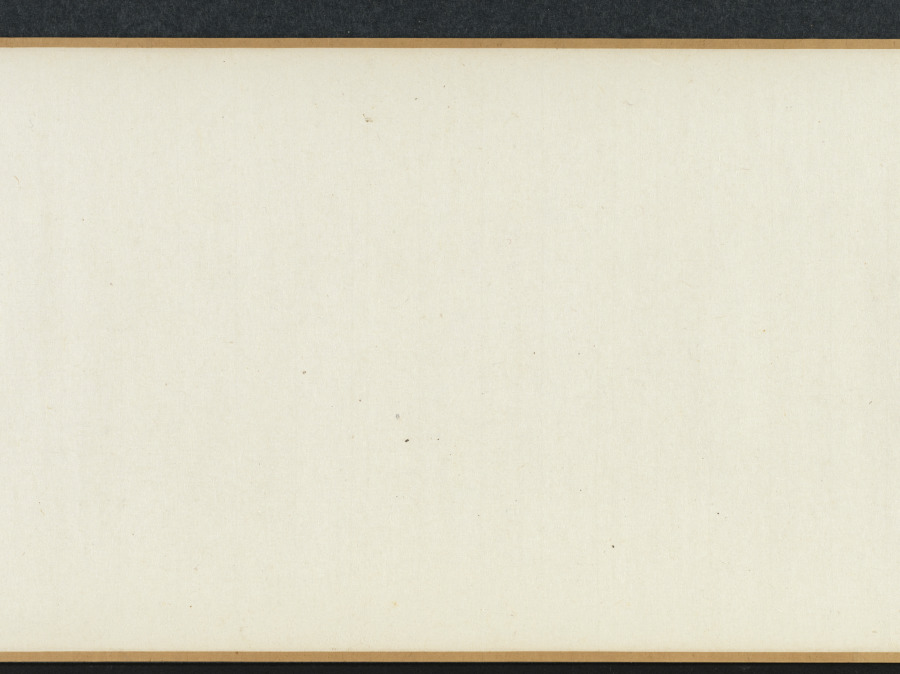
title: Zhao Mengfu Writing the Heart (Hridaya) Sutra in Exchange for Tea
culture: China, Ming dynasty (1368–1644)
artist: Qiu Ying (Chinese, 1494–1552)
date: 1542–43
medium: handscroll, ink and light color on paper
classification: Painting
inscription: Inscription accompanying text of "Heart" sutra, by Wen Zhengming 文徵明 (1470-1559): Zhengming 徵明, written in a boat at Kunshan 崑山, on the twenty-first day of the ninth month, in the renyin 壬寅 year, the twenty-first year of the Jiajing era [1542].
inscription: Colophon by Wang Shih-mou: Chou Yü-shün [Feng-lai] of K'un-shan was a scholarly, refined connoisseur of antiquities. He had acquired the poem written by Chao Ch'eng-chih [Chao Meng-fu] about the exchage of tea for Chao's calligraphy of the Prajna sutra. But the sutra itself, also written by Chao Meng-fu, is lost. He therefore asked Ch'iu Shih-fu [Ch'iu Ying] to do a painting and had Wen Cheng-ming, the artist-in-attendance, write the Hridaya Sutra in the "small, regular" style for replacement. Both works are so excellent that even Chao Meng-fu himself would certainly applaud if he should be reborn to see them. I, Shih-mou, had gotten possession of this scroll from the family of Chou Yü-shün, and since it was so wonderfully matched with one of the treasures in my collection. the Hridaya Sutra written by Chao Meng-fu for Priest Li in "running script," like the reuniting of two halves of a jade pi, I completed the scroll with the several colophons written for the "tea-exchange" poem. I did this because the painting of Ch'iu Ying and the calligraphy of Wen Cheng-ming are definitely masterpieces by themselves with absolutely no need to depend on any of the colophons written for the Chao Meng-fu poem. Furthermore, the two sons of Wen Cheng-ming, Shou-ch'eng [Wen P'eng] and Hsiu-ch'eng [Wen Chia]. have each written a colophon explaining the reason for replacing the calligraphy. As their writings are both acceptable for high standard, I didn't want to throw them away. [So by separating these into two scrolls] I was able to get two complete works of art in one clever stroke. I was quite pleased with myself, and hope that those who see this scroll shall not get suspicious because of the missing colophons. Wang Shih-mou wrote in his Jih-sun-chai study, on the first day of the tenth month, in the chia-shen year of the Wan-li era [1584].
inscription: Colophon by Wen P'eng: I-shao [Wang Hsi-chi] wrote in exchange for a flock of geese. Su Tung-po wrote in exchange for meat. Both episodes have become legends of a thousand years. Sung-hsüeh [Chao Meng-fu] "teased" Priest Kung for tea, and the story was immediately immortalized in the poems by all the famous scholars of the times. Indeed, how could one say his humor and elegance are not equal to the ancient worthies? Unfortunately, the poetry has survived but the writing of the sutra is lost. Yü-shün [Chou Feng-lai] therefore asked my father to make up the writing and so here is the complete work of art. Respectfully inscribed by Wen P'eng in the mid-summer of 1543.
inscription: Colophon by Wen Chia: Sung-hsüeh [Chao Meng-fu], in exchanging tea leaves for his writing of the Prajna, had put himself in the company of Yu-chün [Wang Hsi-chih] who exchanged geese for his writing of the Huang-t'ing sutra [the Yellow Chamber, or the Wai-ching ching, a Taoist text attributed to the Yellow Emperor]. However, was this romantic and cultivated gesture really intended for such small things? Actually, he was only proud that the excellence of his calligraphy had made him worthy to be the successor of the Ch'in Dynasty master. Since, very unfortunately, Chao Meng-fu's writing [of the Prajna] was already lost, my father therefore agreed to replace it, and did the calligraphy in the style of the Yellow Chamber. In addition, Yu-shün [Chou Feng-lai] had asked Mr. Ch'iu Shih-fu [Ch'iu Ying] to do a painting of the sutra writing story in the style of Li Lung-mien at the head of the scroll. Now it would seem the entire episode should go down in history for immortality. Respectfully recorded by Wen Chia, on the eighth day of the eighth month, in the year of k'uei-mao [1543]. trans. WKH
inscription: 4 colophons and 23 seals: 1 colophon, dated 1543, and 2 seals of Wen Peng (1498-1573); 1 colophon, dated 1543, and 2 seals of Wen Chia (1501-1583); 1 colophon, dated 1584, and 3 seals of Wang Shih-mou (1536-1588); 2 seals of Chou Feng-lai (16th c.); 3 seals of Sung Lo (1634-1713); 5 seals of the Ch'ien-lung emperor (r. 1736-95); 1 colophon, dated 1902, and 1 seal of Fei Nien-tz'u (1885-1905); 4 seals of Wan-go H. C. Weng (b. 1918); 1 seal unidentified.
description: The Yuan dynasty calligrapher Zhao Mengfu (1254–1322) is said to have transcribed the Heart Sutra for a certain priest named Li in exchange for tea. Later, during the Ming dynasty, the professional painter Qiu Ying from Suzhou painted this scene for his patron. Here, Zhao Mengfu holds a brush and has a piece of paper laid out before him. On the table is an ink stone, an ink stick, and a small water dropper. Drops of water would dissolve the ink stick into liquid ink when it was ground on the flat square stone.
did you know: Qiu Ying was born to a peasant family, but his natural talent led him to a successful career as a professional painter with wealthy patrons.